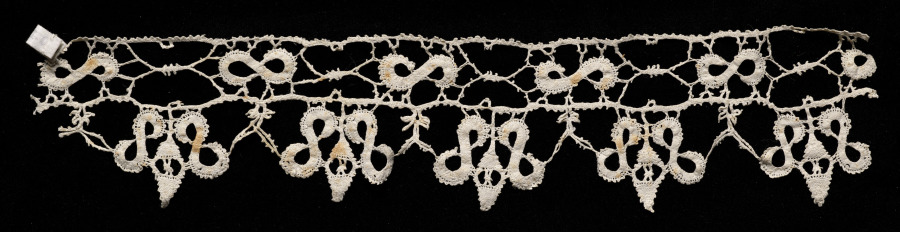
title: Lace Edging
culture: Italy, Venice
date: 1500s–1600s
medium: Bobbin lace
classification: Lace